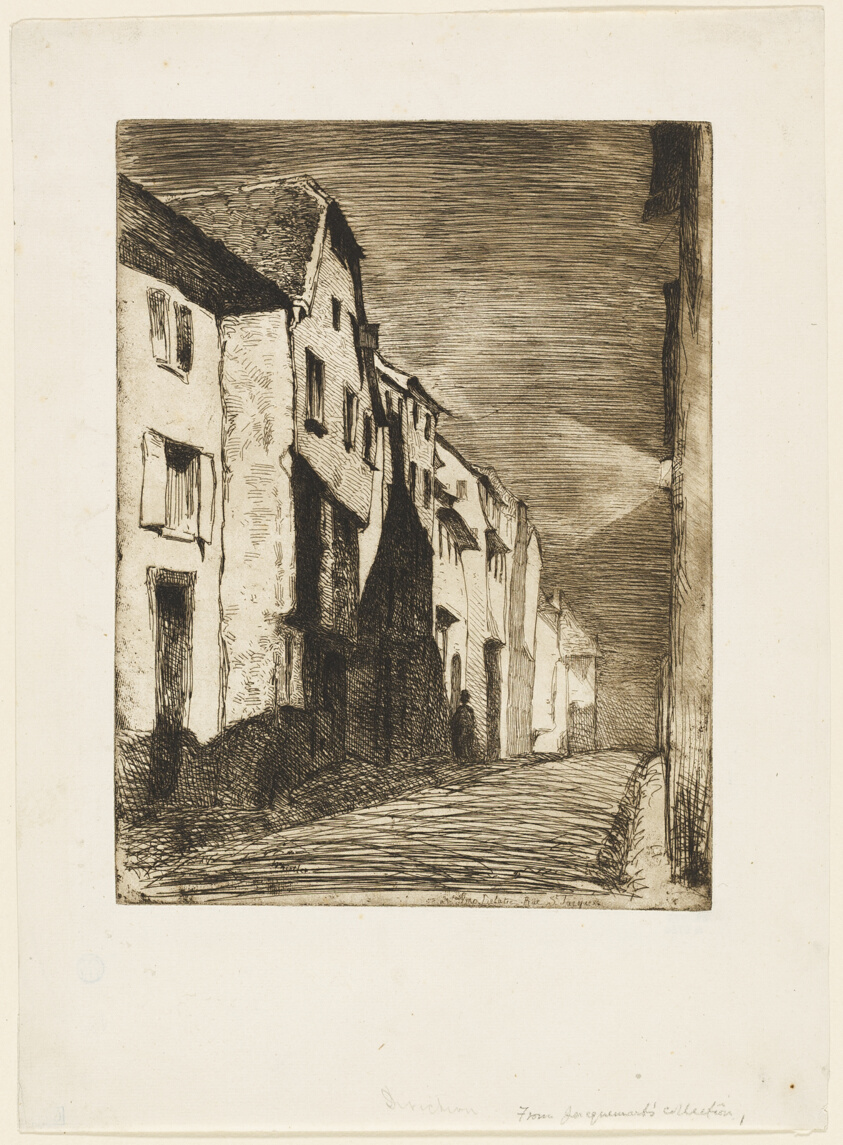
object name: Print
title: Street at Saverne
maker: James McNeill Whistler (American, 1834-1903)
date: 1858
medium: Etching with foul biting in dark brown ink on off-white laid paper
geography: United States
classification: etching; foul biting; print; prints and drawing; paper